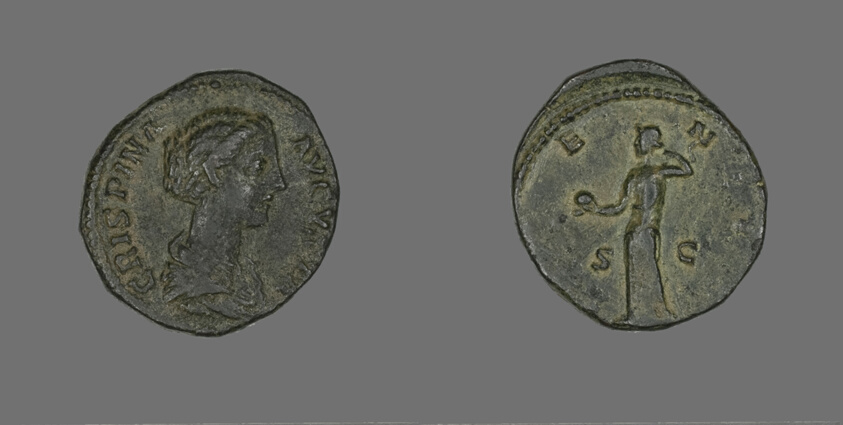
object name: Coin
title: Coin Portraying Empress Crispina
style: imperial (roman), ancient, roman (ancient, style or period)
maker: Roman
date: 177-183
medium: Bronze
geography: Roman Empire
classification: coin; struck; ancient art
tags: goddesses